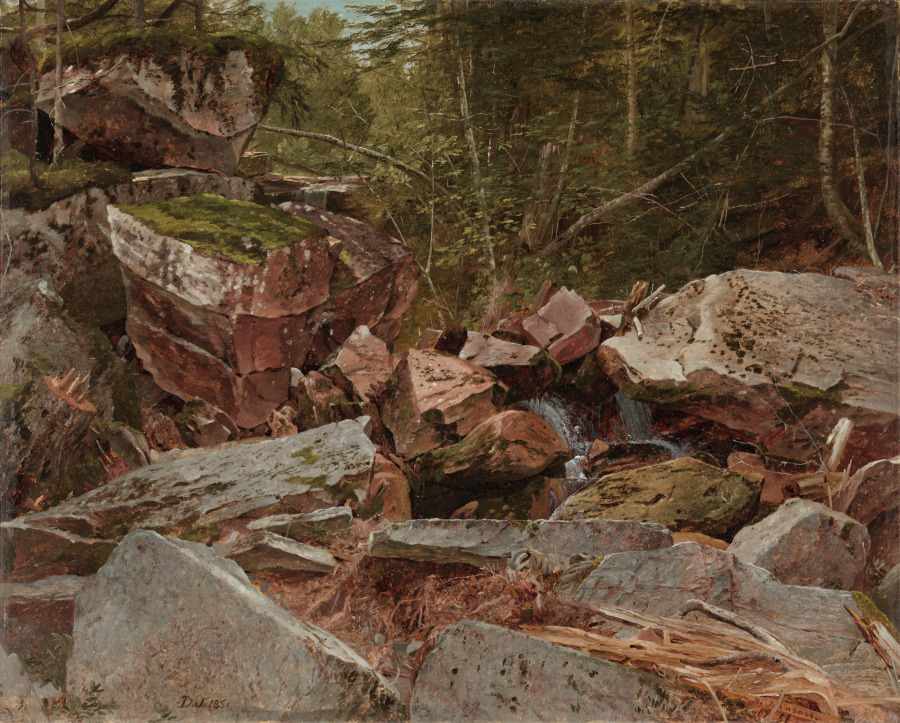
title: Study, North Conway, New Hampshire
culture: America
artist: David Johnson (American, 1827–1908)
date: 1851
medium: oil on canvas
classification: Painting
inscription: Signed lower right: "D. Johnson. / 1851"; inscribed lower left: "D.J. 1851. (false); signed on the back: "Study. North Conway. N.H. / David Johnson 1851]"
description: Johnson’s devotion to carefully observing nature is evident in his detailed rendering of a riverbed. Located in a village that provided a popular jumping-off point for tourists visiting the White Mountains, this untamed site features a haphazard arrangement of angled boulders, slippery moss, splintered tree branches, and dense undergrowth. Contemporary travel guidebooks often cautioned against the physical challenges—and the potential for injury—encountered by venturing into such inner recesses of the woods; one warned that “wild forest-clambering” could be akin to “fighting a phalanx of porcupines.”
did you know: North Conway, New Hampshire, markets itself as the birthplace of American skiing.